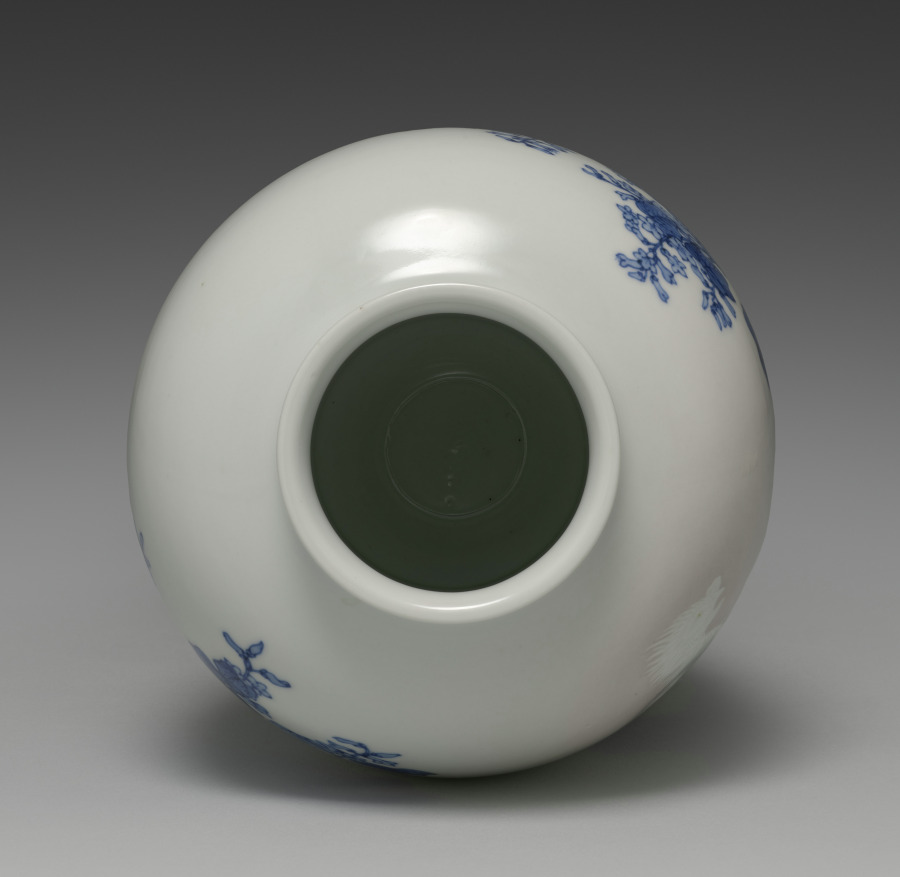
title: Flower Vase with Phoenix in Paulownia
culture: Japan, Meiji period (1868–1912)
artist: Seifū Yohei III (Japanese, 1851–1914)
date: 1897–1914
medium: Porcelain with molded and carved design and underglaze color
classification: Ceramic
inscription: 清風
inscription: 清風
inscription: 清風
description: The phoenix’s commanding presence on this vase was created by adding clay to the surface of the white clay body and then intricately molding and carving it. Then cobalt blue was used to paint the paulownia tree upon which the phoenix perches. Yohei III used a masking technique, covering the phoenix with paper before adding pink color to the area surrounding it. Firing with an allover transparent glaze created a glossy surface, with the phoenix standing out boldly from the background. The mythical bird’s long tail sweeps majestically around the vessel so that one must move around it to see the eyespots in its plumes. A symbol of imperial power in both China and Japan, the phoenix is said to alight only in the paulownia tree. Upon close inspection of its face, one can see that the phoenix’s eye is in yellow under the glaze. The scene is set off at the bottom with a double band of underglaze blue above an incised ring of cloud. Once Yohei III had created his creamy translucent taihakuji glaze, he began applying it over the entire surface of an ivory clay body with motifs in low relief to achieve a creamy white-on-white design. He then began using the combination of gradated pink around raised motifs on a typical white porcelain clay body like the one for this vase. He masked his low-relief designs with paper before sprinkling diluted iron oxide glaze onto the surrounding areas through a net with a brush. These unpigmented elements stand out as starkly white against the gentle pink blush color that surrounds them. Still later, he added pink to the translucent creamy glaze he used in kanpakuji works and used it over motifs in relief on an ivory clay body for an overall pink-tinged cream effect (see CMA 2022.198).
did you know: In 1893, Seifū Yohei III became the first ceramist to be appointed as an Imperial Household Artist under a system introduced by the Japanese government in 1890.